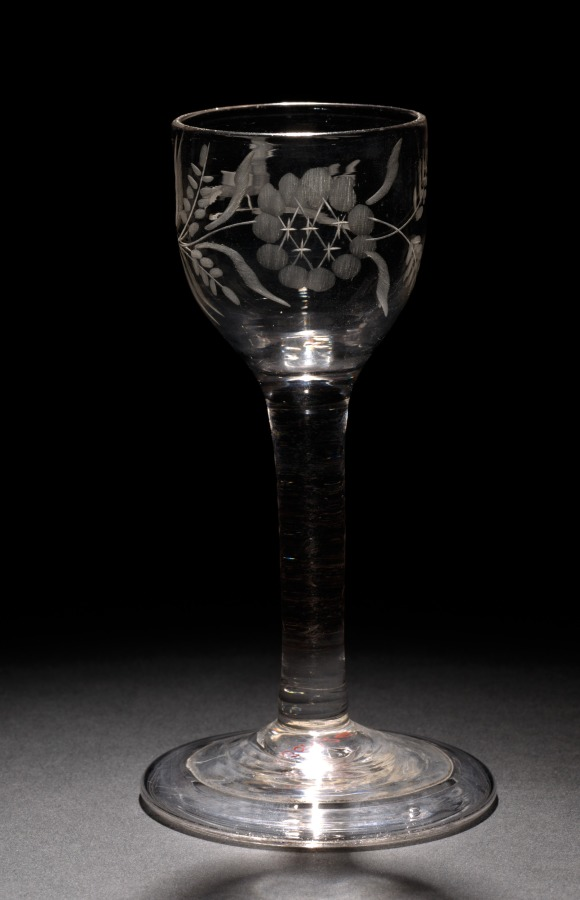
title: Wine Glass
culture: England, 18th century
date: 1750–1799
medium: glass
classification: Glass